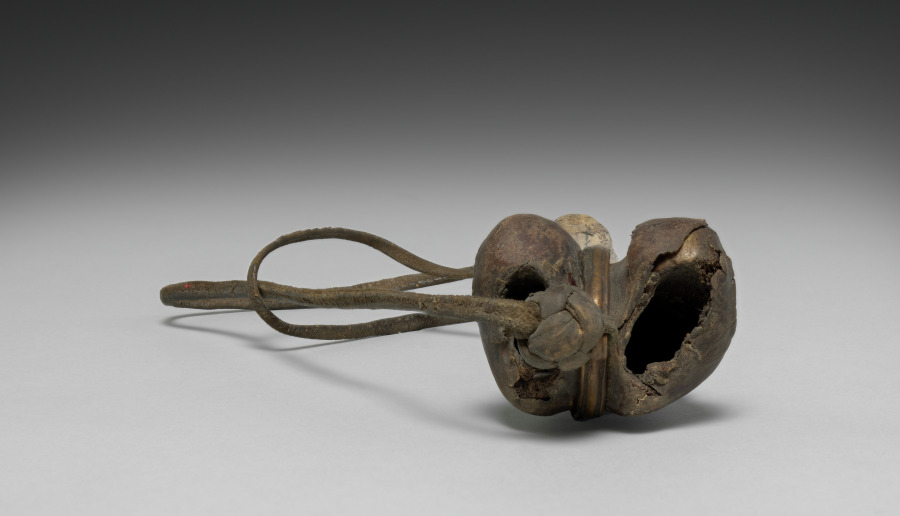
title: Thighbone Trumpet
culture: Tibet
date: c. 1800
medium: bone, leather, and copper alloy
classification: Musical Instrument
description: Blown during tantric Buddhist rituals, this ritual instrument is made of bone to remind practitioners of the impermanence of the corporeal body. The horn is sounded to clear away obstacles to enlightenment, conceived as enemies in battle.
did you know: Tantric ritual trumpets are traditionally made from human femurs, but now they can be made from plastic, metal, or other materials.